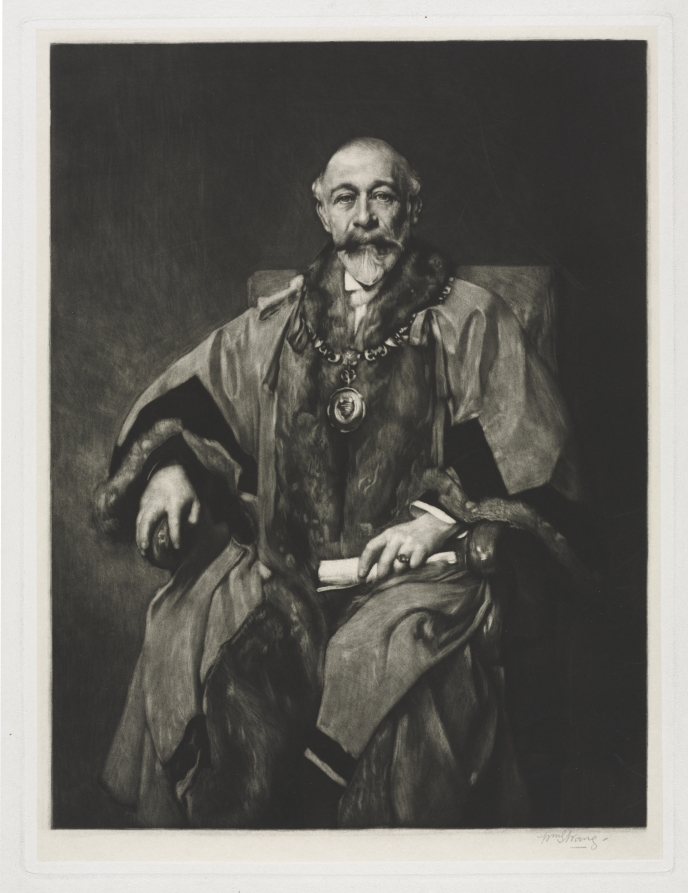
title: Sir Bartle Frère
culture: England, late 19th-early 20th century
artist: William Strang (British, 1859–1921)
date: late 1900s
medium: mezzotint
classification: Print